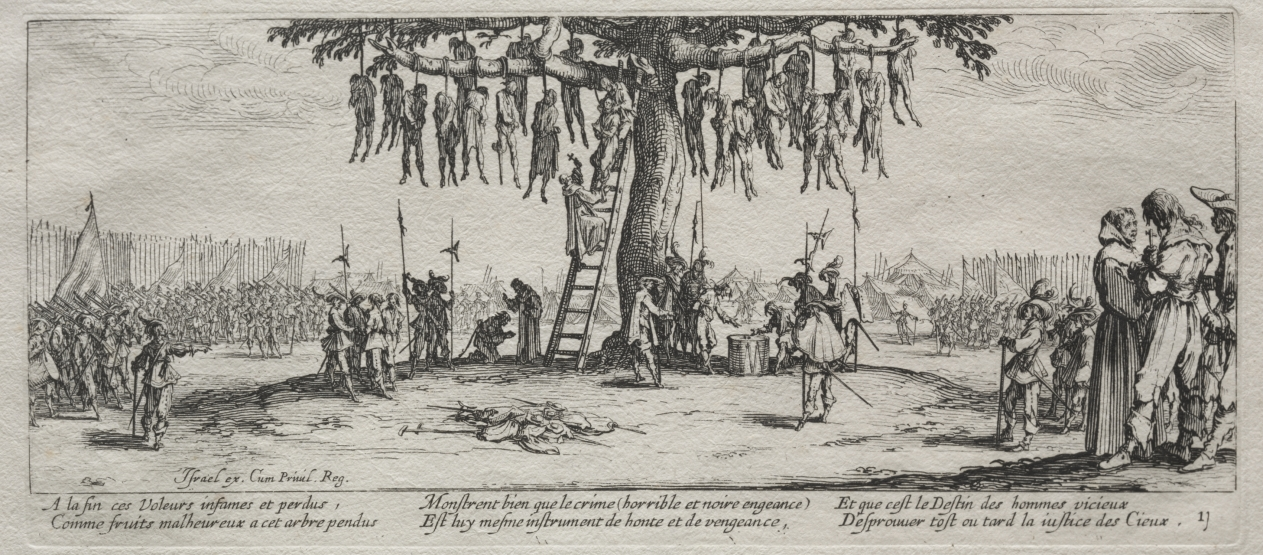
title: The Large Miseries of War: The Hanging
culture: France, 17th century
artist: Jacques Callot (French, 1592–1635)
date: 1633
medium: etching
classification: Print